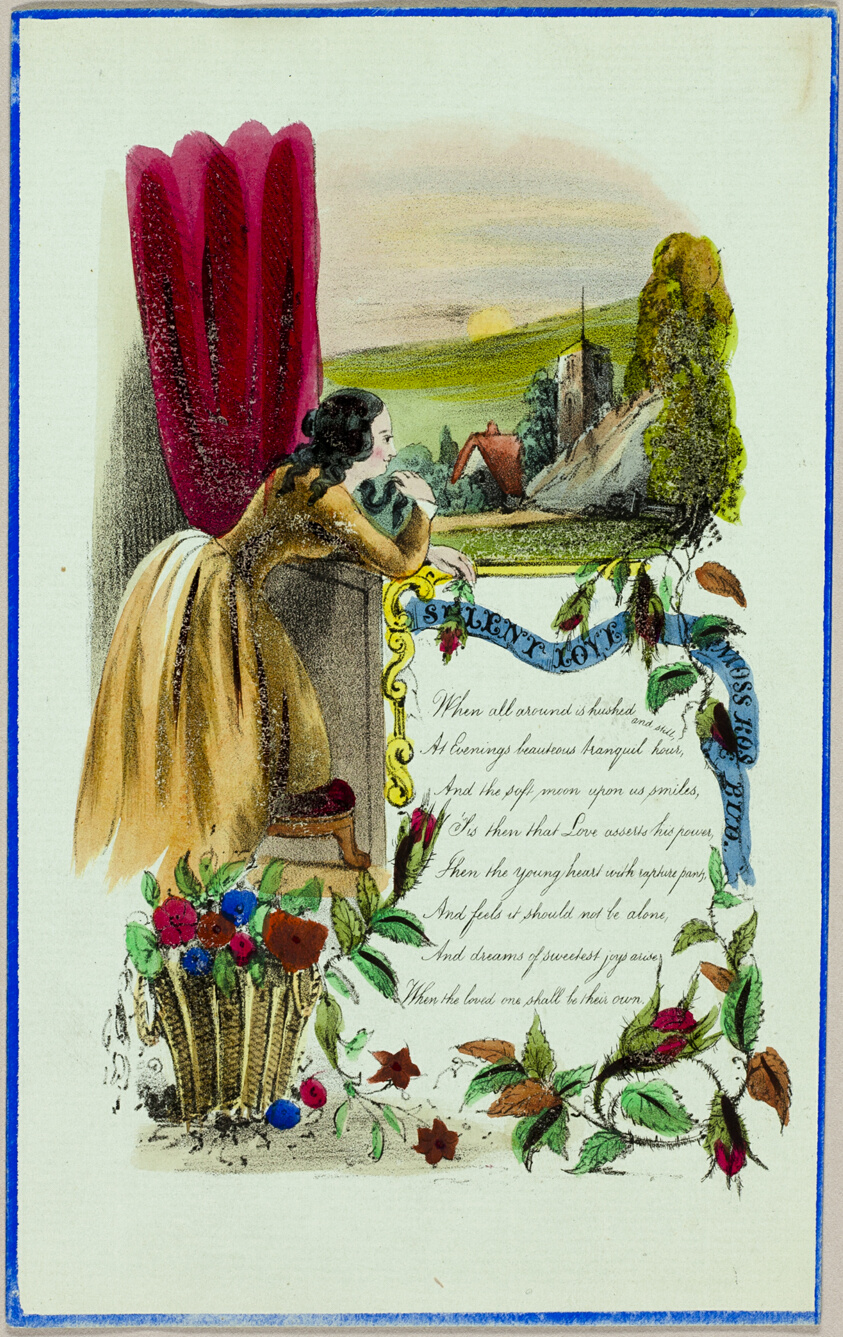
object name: Print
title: Silent Love (valentine)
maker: Unknown Artist; English, 19th century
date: c. 1840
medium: Lithograph with hand-coloring on blue-green laid paper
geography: England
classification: valentine; prints and drawing; print